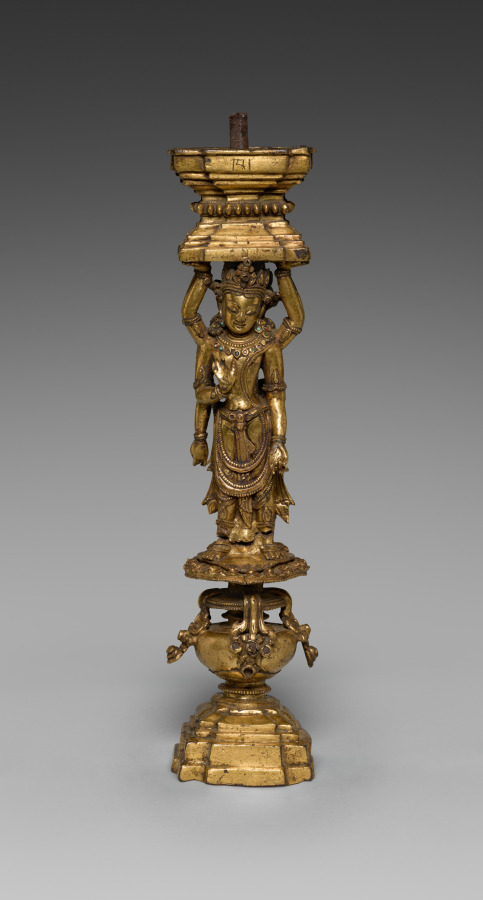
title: Support with Addorsed Figures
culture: Tibet, Densatil Monastery, 15th century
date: 1400s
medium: gilt bronze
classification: Sculpture